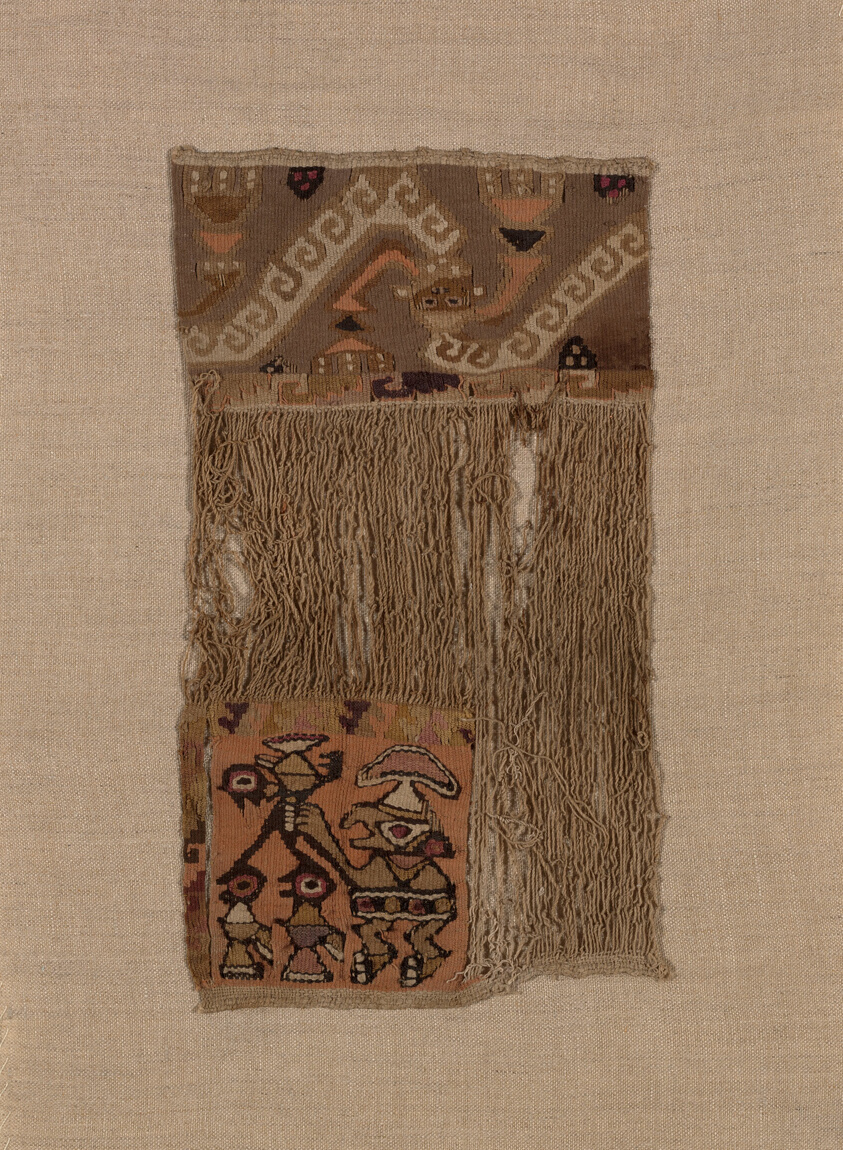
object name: Textile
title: Fragment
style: lambayeque, chancay, late intermediate period, Pre-Columbian, americas, chimú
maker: Possibly Lambayeque; Probably north or central coast, Peru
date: A.D. 1000/1476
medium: Cotton and wool (camelid), slit tapestry weave with eccentric and wrapping outlining wefts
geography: Peru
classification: textile; weaving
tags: birds, animals